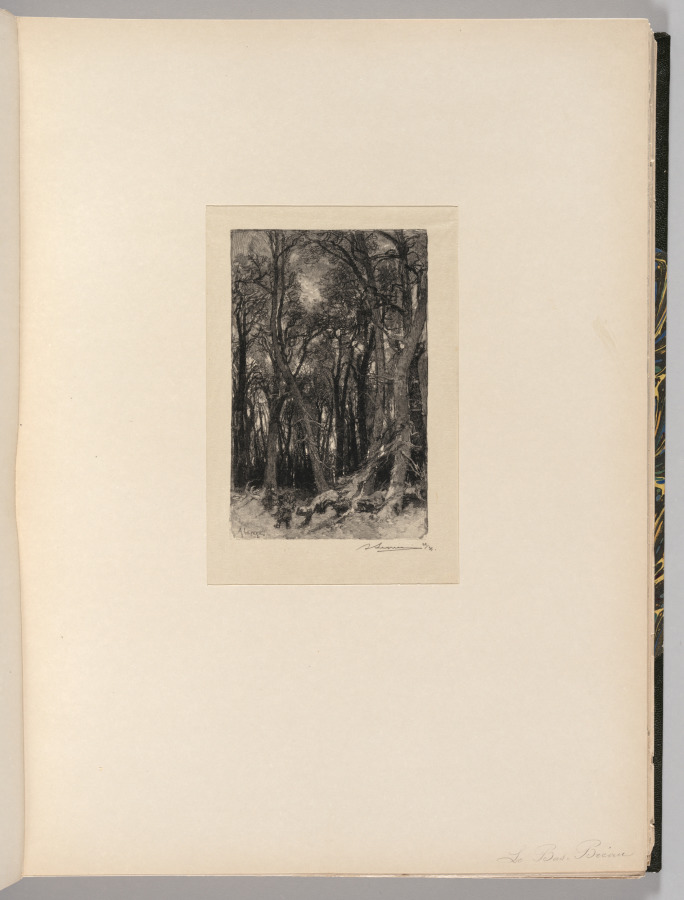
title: Fontainebleau Forest: Bas-Bréau (La Forêt de Fontainebleau: Le Bas-Bréau)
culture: France, 19th century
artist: Auguste Louis Lepère (French, 1849–1918)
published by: A. Desmoulins, Published in Revue Illustrée, 1887–90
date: 1890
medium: wood engraving from bound volume of 34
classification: Bound Volume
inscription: Below image, lower right, in black ink: ALepère 22/35; on block, lower left: ALEPÈRE; On window mat, lower right, in graphite: Le Bas-Bréau